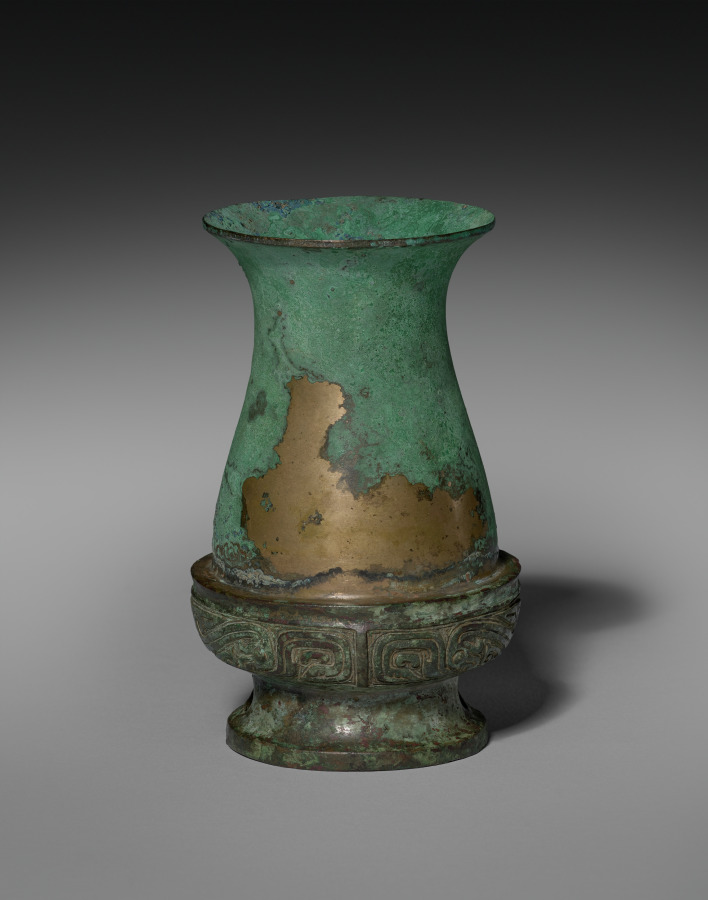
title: Wine Vessel (Hu) (lid)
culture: China, Western Zhou dynasty (c. 1046–771 BCE)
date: c. 1000–900 BCE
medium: bronze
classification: Metalwork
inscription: inscription inside top (cup): 事从作壺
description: This tall, slender bronze wine vessel, called a hu, has three bands of ornamentation: one above the foot, one around the neck, and one on the cover. Stylized birds or phoenixes are in the band around the neck, while the band on the cover and foot feature geometric dragons. The dragon and the phoenix may represent the Yin and Yang and would be equally appropriate on a bronze of either secular or religious purposes. It likely held liquids like wine at festive banquets or religious ceremonies.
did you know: When inverted, the cover forms a cup.